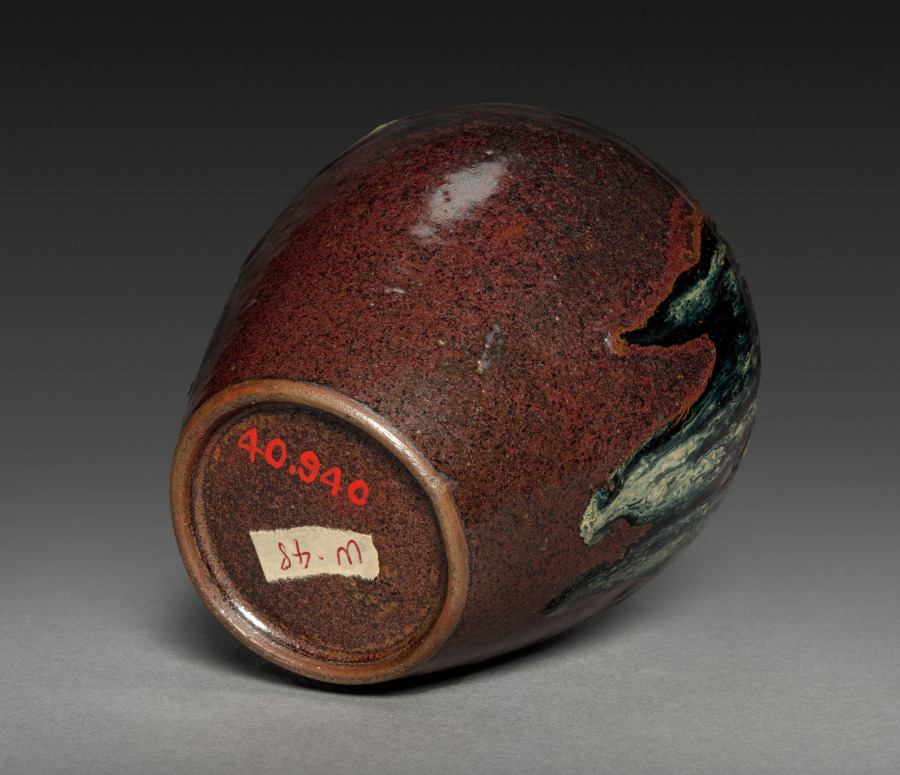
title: Inverted Pear-Shaped Jar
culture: Japan, Edo period (1615–1868)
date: 1800s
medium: pottery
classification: Ceramic